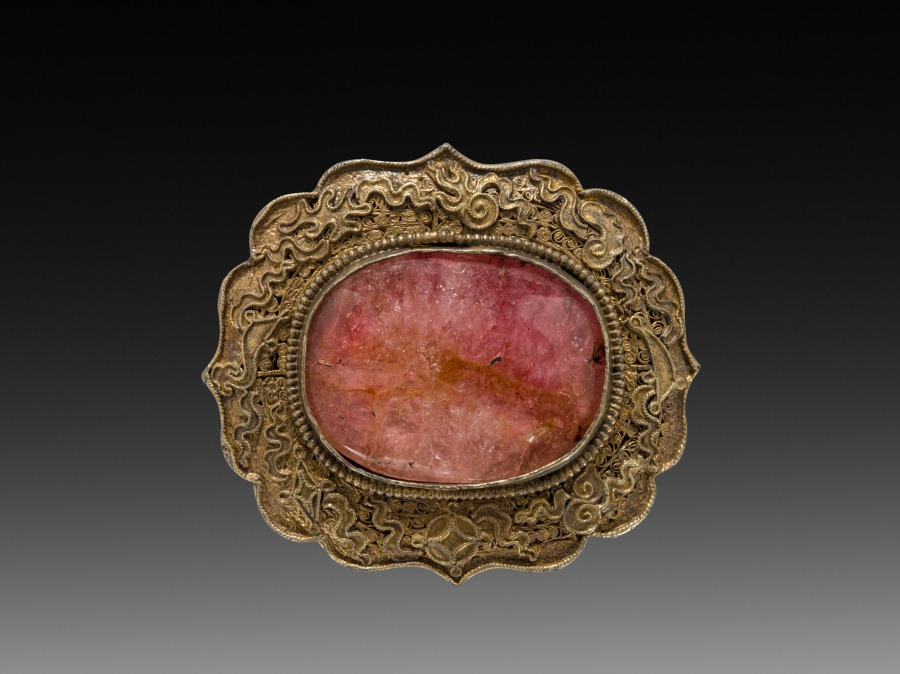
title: Buckle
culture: China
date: 1900s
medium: silver gilt with filigree work, set with rose quartz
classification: Jewelry